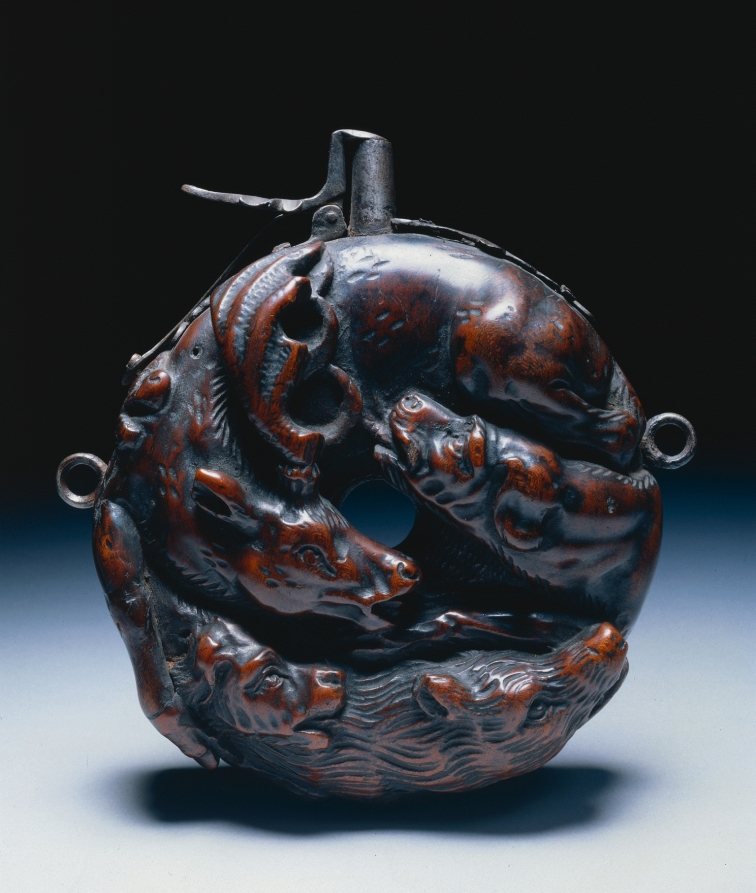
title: Powder Flask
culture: German, Swabian, Gmünd, 17th century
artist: Johann Michael Maucher (German, 1645–1701)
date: c. 1680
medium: boxwood with design of stag and hounds carved in high relief; steel funnel, mounts, springcatch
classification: Arms and Armor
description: Powder flasks are small, portable containers designed to hold gunpowder. From the 1400s to the 1800s, powder flasks were indispensable for charging and priming firearms of all types. Without powder flasks firearms were of little use to their owners. Many highly decorated flasks rank as works of art.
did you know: Johann Michael Maucher was the most famous member of a Schwabian family of ivory, wood, and amber carvers.